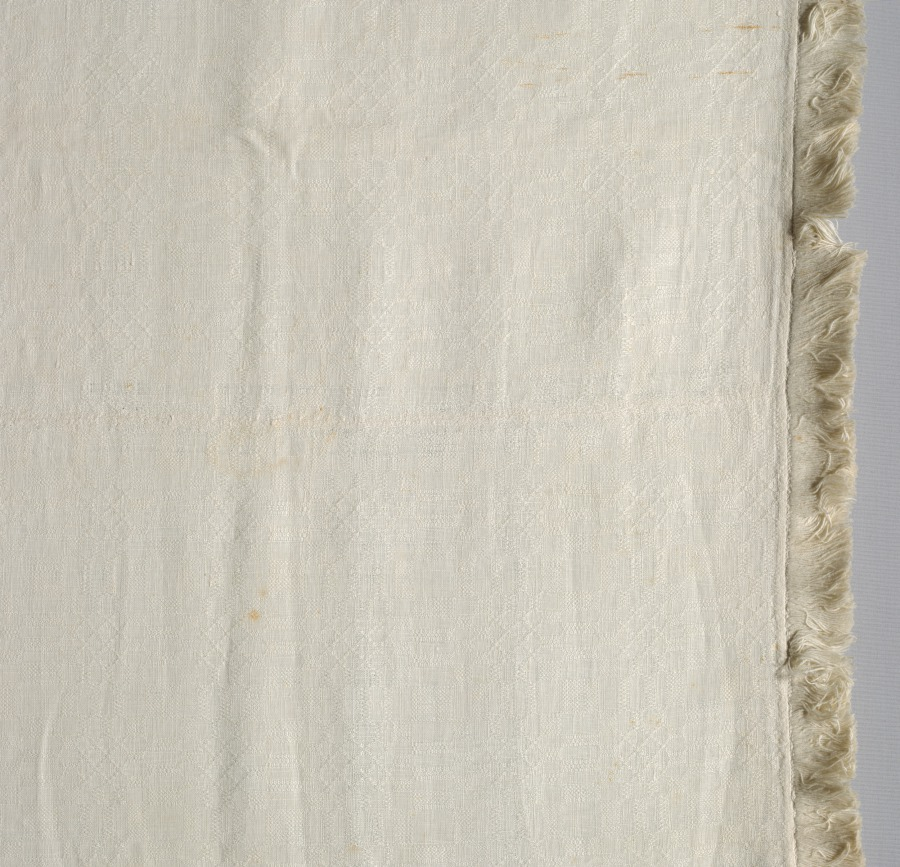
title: Tablecloth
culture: America, Connecticut, early 19th Century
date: c. 1800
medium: linen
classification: Textile